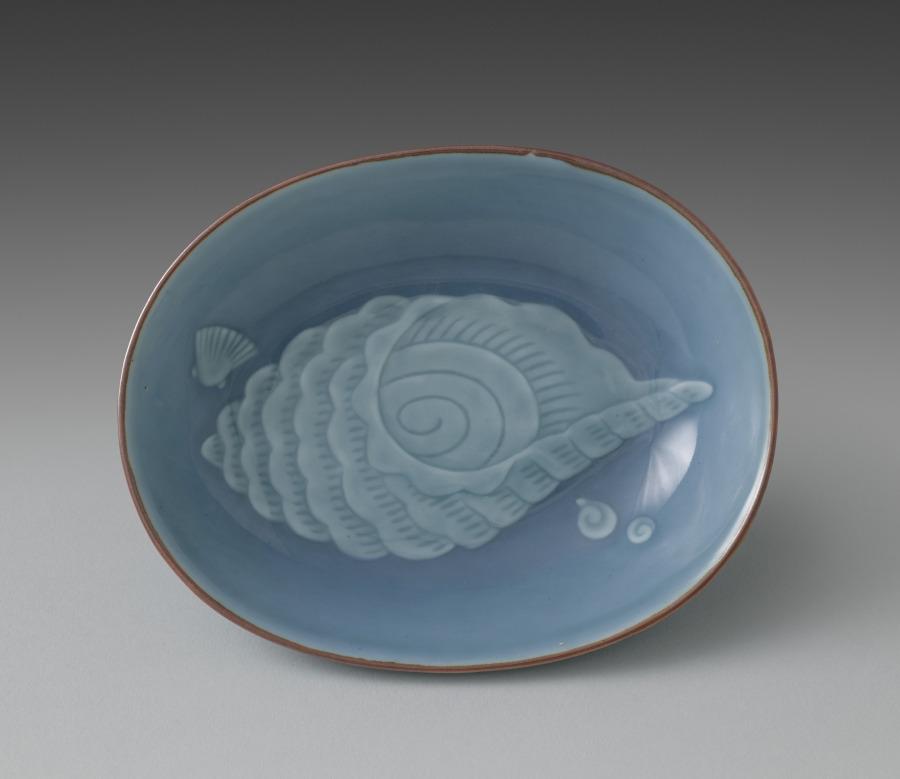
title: Dish from Dishes with Shells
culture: Japan, Taishō period (1912–26)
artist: Seifū Yohei IV (Japanese, 1872–1951)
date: 1914–46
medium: One from a set of five dishes; porcelain with blue glaze, iron oxide, and molded design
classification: Ceramic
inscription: 清風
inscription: 清風造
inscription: 清風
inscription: 成山清風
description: Yohei IV chose an aquatic theme for this set of five mukōzuke, side dishes. He added an iron oxide rim and used a concentrated blue glaze on both the interior and exterior. The glaze, named on the box lid, is his father’s “evening moon” (tsukiyoi) color. The conch in relief takes up the entire bottom of the dish. Up the sides are two snails on one end and on the other a scallop. This results in a boldly graphic, less realistic effect.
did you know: This set of dishes, mukōzuke, could be used for serving small side dishes at a tea gathering.